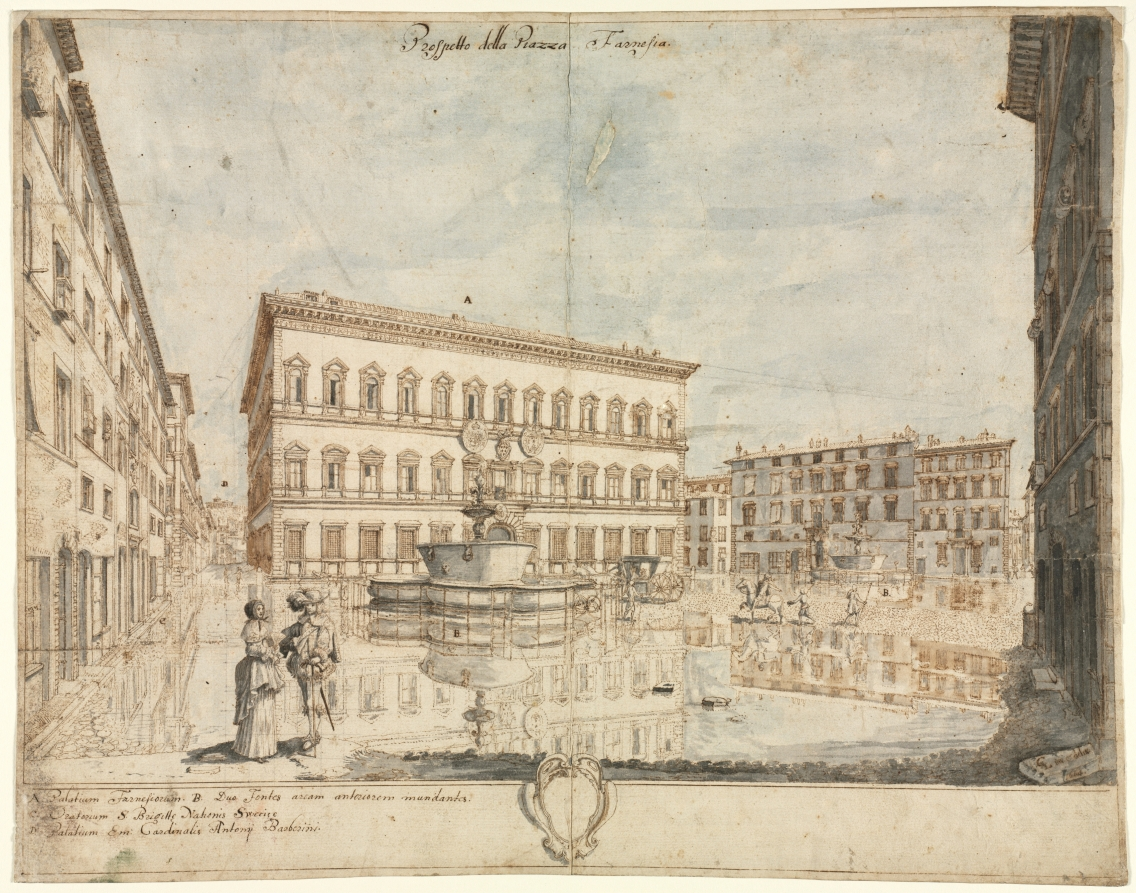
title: Eighteen Views of Rome: The Piazza Farnese (recto)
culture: Flanders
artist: Lievin Cruyl (Flemish, c. 1640-c. 1720)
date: 1664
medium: pen and brown ink and brush and gray and blue wash over graphite; squared in graphite (two figures in the foreground); framing lines in brown ink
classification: Drawing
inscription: signed, lower right, in brown ink: [artist's monogram: LC] inv. et delin. / 1664. ; by artist, upper center, in brown ink: Prospetto della Piazza Farnesia. ; by artist, througout composition, in brown ink: [the letters A-D] ; by artist, lower left, in brown ink: A. Palatium Farnesiorum. B. Duo Fontes aream anteriorem mundantes. / C. Oratorium S. Brigitte Nationis Sweciæ / D. Palatium Em: Cardinalis Antonij Barberini.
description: Flemish artist Lieven Cruyl made a number of drawings of emblematic vistas of Rome for the Roman publisher Giovanni Battista de Rossi, of which ten were published as etchings in 1666. The Piazza Farnese features architecture designed by Michelangelo, who completed the Palazzo Farnese after the death of its original designer, Antonio da Sangallo, in 1546. His main contribution was the third story and the significantly protruding cornice at the top of the facade, which dramatically hangs over the front of the building, like sculpture.